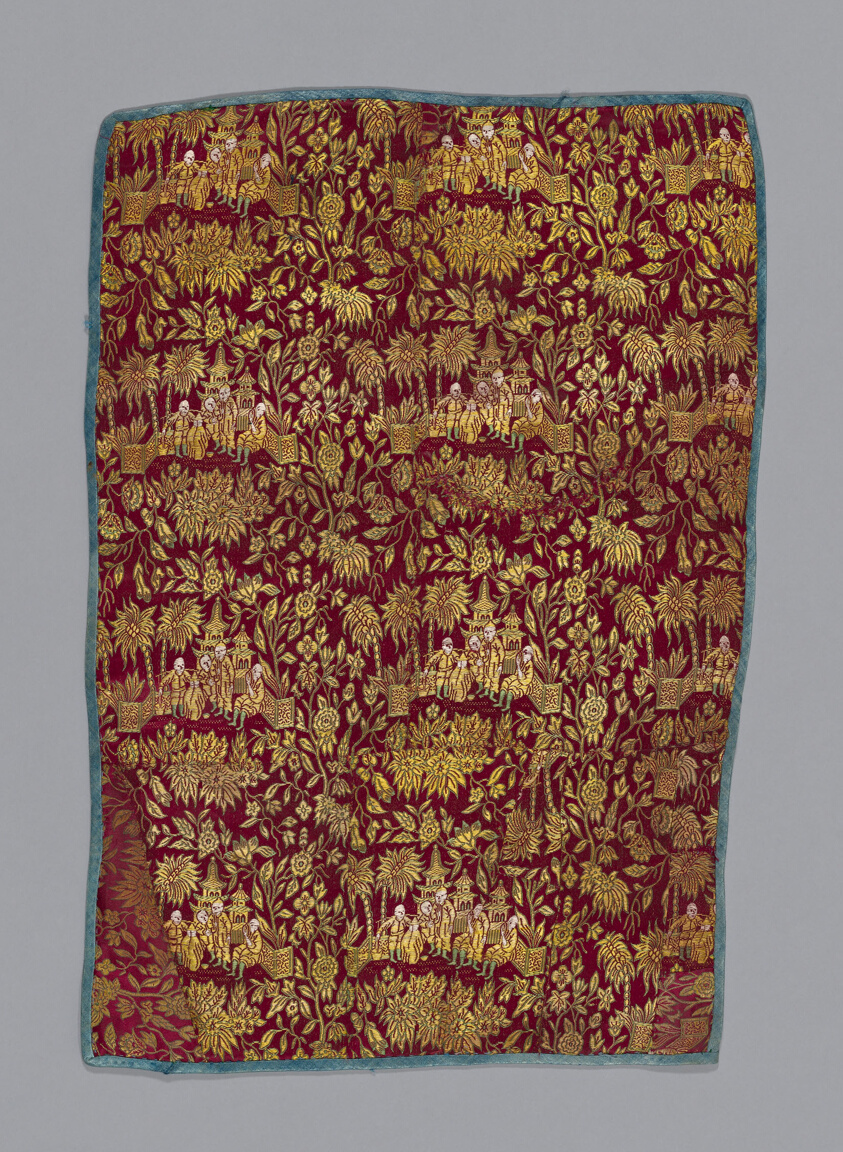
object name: Textile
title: Panel (Dress Fabric)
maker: Iran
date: 18th/19th century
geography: Iran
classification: textile; weaving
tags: Floating Gardens